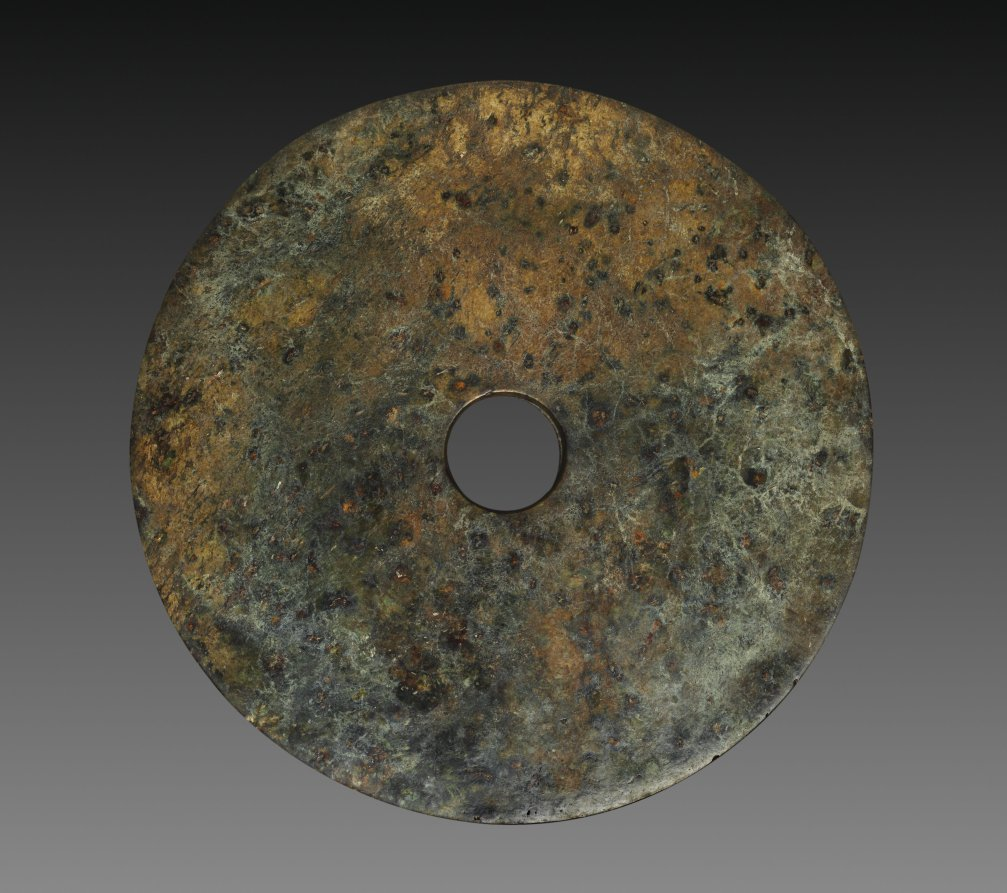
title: Ceremonial Disc (Bi)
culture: East China, Neolithic period, Liangzhu culture (3300–2200 BCE)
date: 3300–2200 BCE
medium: jade (nephrite)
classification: Jade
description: The Liangzhu culture, one of the later Neolithic cultures of East China, excelled in jade working. Exceptionally large versions like this disc are rare and usually occupied pride of place on the chest of the buried. Traditionally called bi, these plain discs, together with cong, squared cylinders, form an essential ritual pair in Liangzhu burials of high-status individuals.